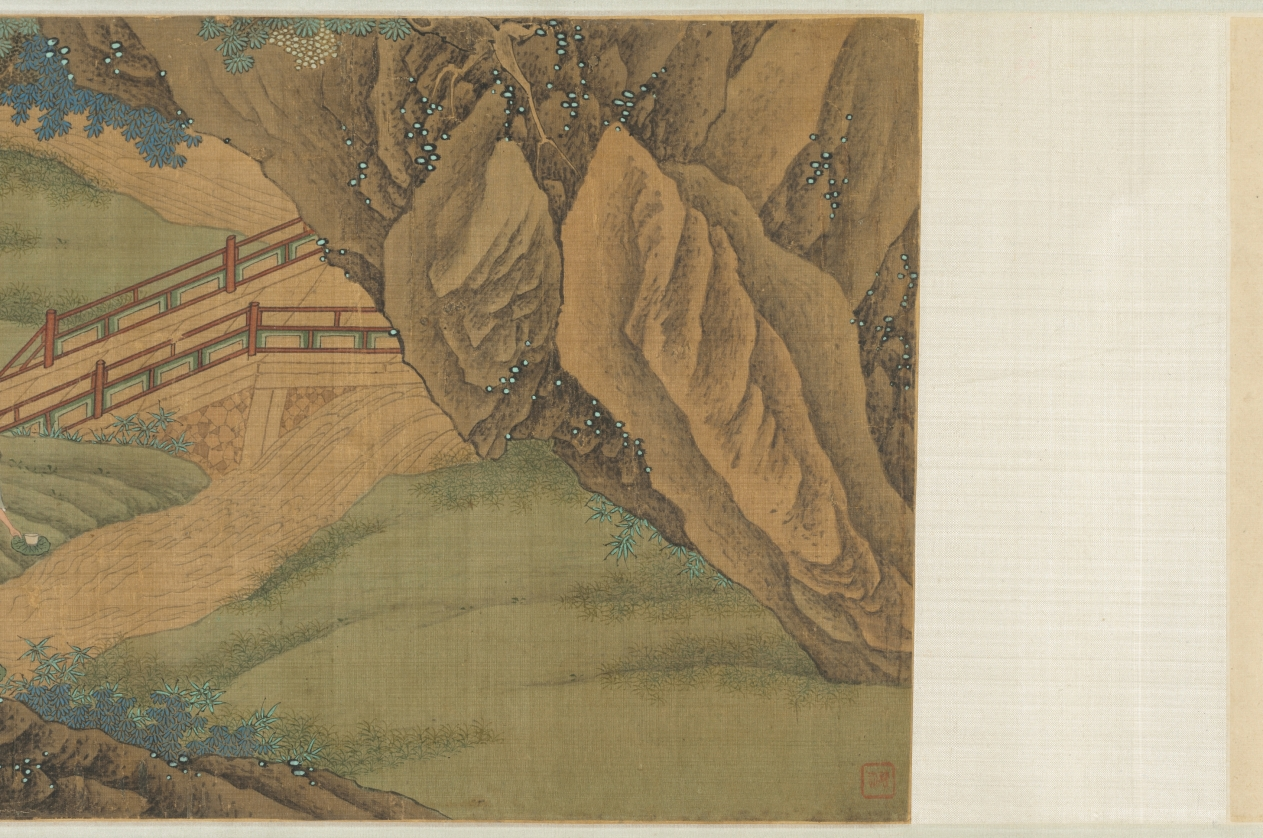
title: Purification at the Orchid Pavilion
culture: China, Qing dynasty (1644-1911)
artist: Fan Yi (Chinese, c. 1615–before 1688)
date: 1671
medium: Handscroll; ink and color on silk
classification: Painting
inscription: Artist's inscription, signature, and 2 seals: Painted by Fan Yi of Zhongfu during the second month of winter of the xinhai year [1671]. [2 seals] Fan Yi zhi yin, Zi yu yi.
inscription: Title on the frontispiece by Monk Yueshan (1629-1709).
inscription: 3 colophons and 13 additional seals: 1 colophon, dated 1707, and 6 seals of Yueshan; 2 colophons and 3 seals of Wong Kwan-Shut (Huang Junshi) 黃君實 (b. 1934); 2 seals of Fu Shen 傅 申 (b. 1937); 2 seals of Tessai Tomioka 富岡鐵齋 (1836-1924).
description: By the 1600s, the historic gathering at Lanting, Zhejiang province, in 353 CE was a common theme in Chinese painting. Originally based on a composition attributed to Li Gonglin (1049– 1106), now lost, Wu school artists revived the theme. Fan Yi, the brother of the artist Fan Qi from Nanjing, used delicate brushwork and luminous colors to depict the spring gathering.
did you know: The gathering’s host is in the Orchid Pavilion at the end of the scroll, representing an episode known as “Wang Xizhi Watching the Geese 王羲之觀鵝圖.”